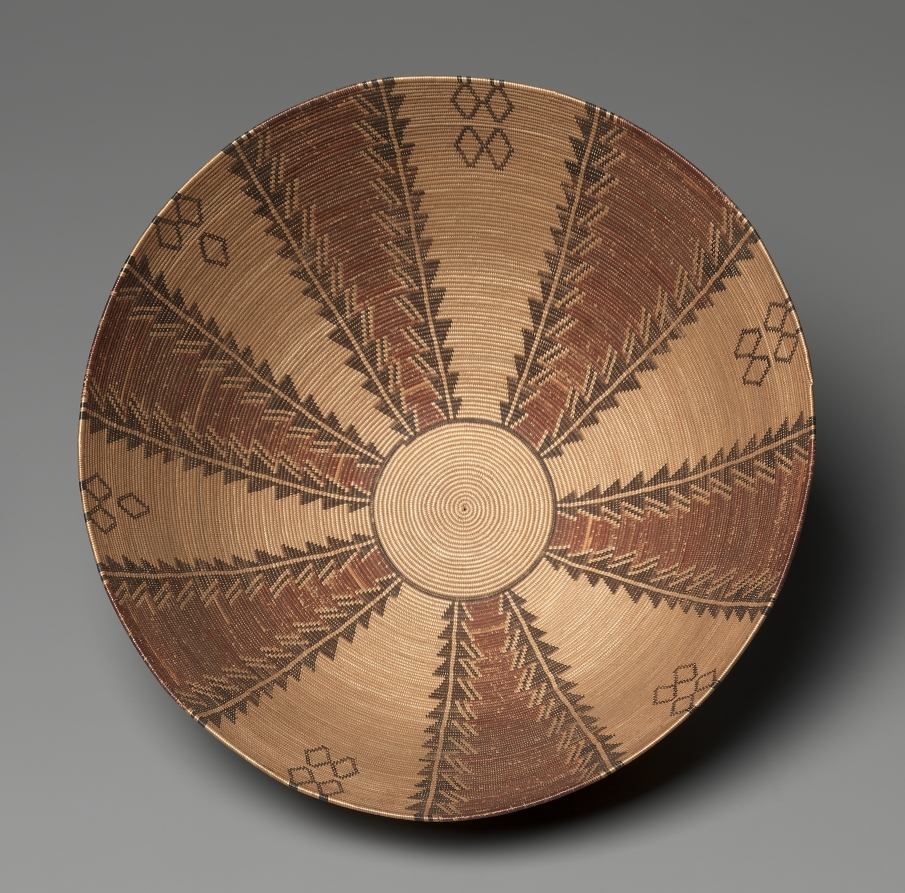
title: Presentation Bowl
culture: Native North America, Great Basin, California, Death Valley, Timbisha (Panamint) Shoshone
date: 1900–1905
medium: Willow, devil's claw, yucca root; coiled ( 3 rods)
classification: Basketry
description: This basket was made for the Euro-American collectors’ market in the early 1900s but it is modeled on basketry bowls from which the Timbisha (Panamint) Shoshone once served food. When used indigenously, the main view would have been of the interior. Made-for-sale baskets testify to Indigenous women’s truly creative, resilient responses to forces that endangered their livelihoods and existence.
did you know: This basket mingles 19th-century design features with 20th-century innovations, including the construction method.